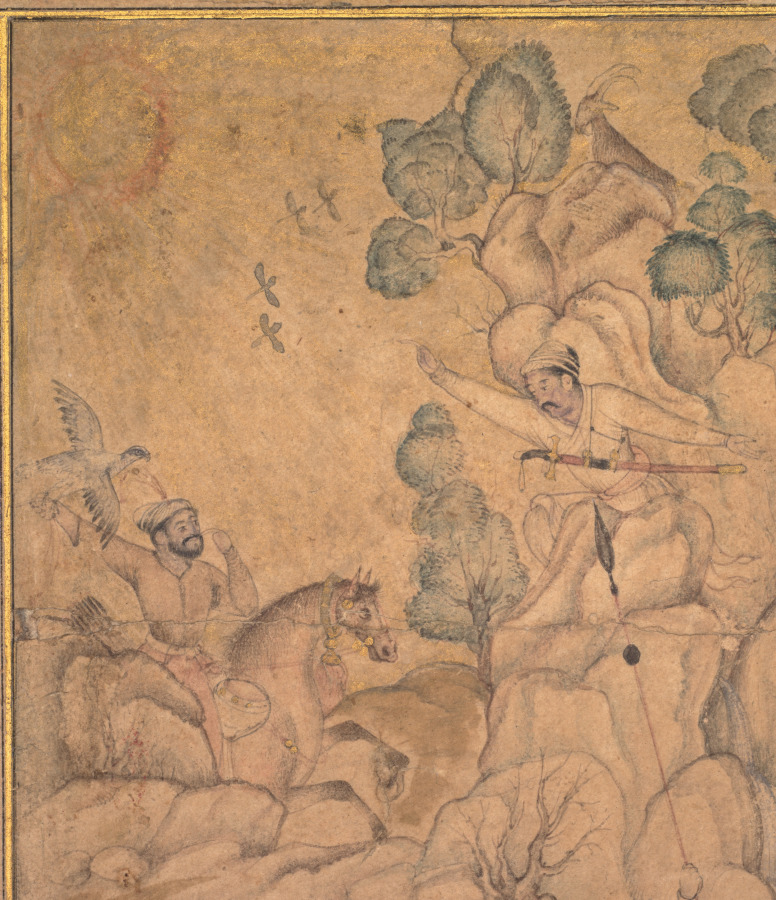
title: Princes hunting in a rocky landscape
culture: India, Mughal, 16th century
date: c. 1580–85; borders added c. 1700s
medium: Ink, slight color, and gold on paper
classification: Painting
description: The subdued palette of this tinted drawing belies the dire events of the scene. A group of Mughal nobles out hunting with falcons has chanced upon two lions in the wilderness, and one of the men has been attacked. The bearded figure with the falcon at the upper left and the huntsman about to retrieve a duck caught by one of the trained falcons at the lower left are reminiscent of an earlier work, Hunting with Falcons in a Landscape (CMA 2013.292), painted by a Persian artist. By the time this painting was made Akbar exerted more direct influence on his artists’ work, and it reveals his taste for dramatic action and climactic moments where life and death hang in the balance.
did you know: A hunter with gunpowder pouch hurriedly loads a musket with a scouring stick.